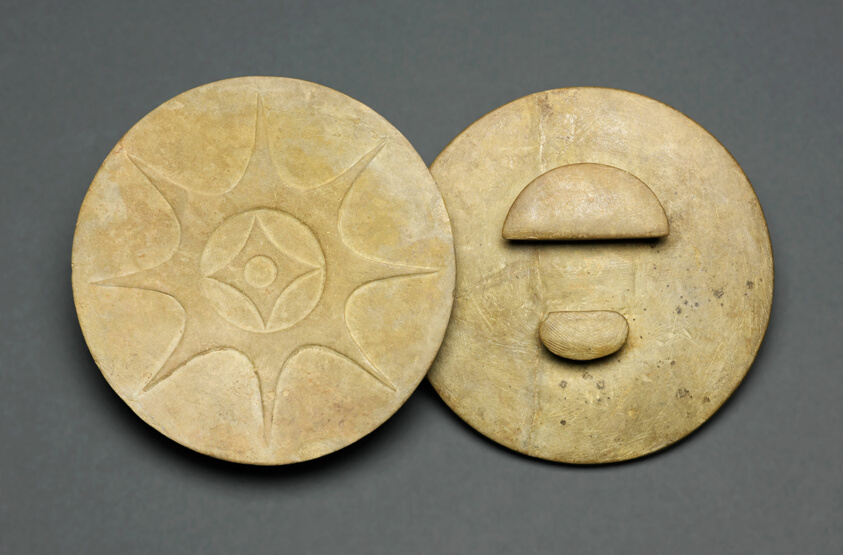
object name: Costume and Accessories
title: Pair of Earspools with Eight-Pointed Star Motif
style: mississippian, native american, archaic america, midwestern, Arts of the Americas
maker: Mississippian (Possibly Oklahoma, LeFlore County, Spiro, United States)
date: 1200–1400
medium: Stone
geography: Oklahoma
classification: ear ornament; art of the americas; costume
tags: star, directions, costume